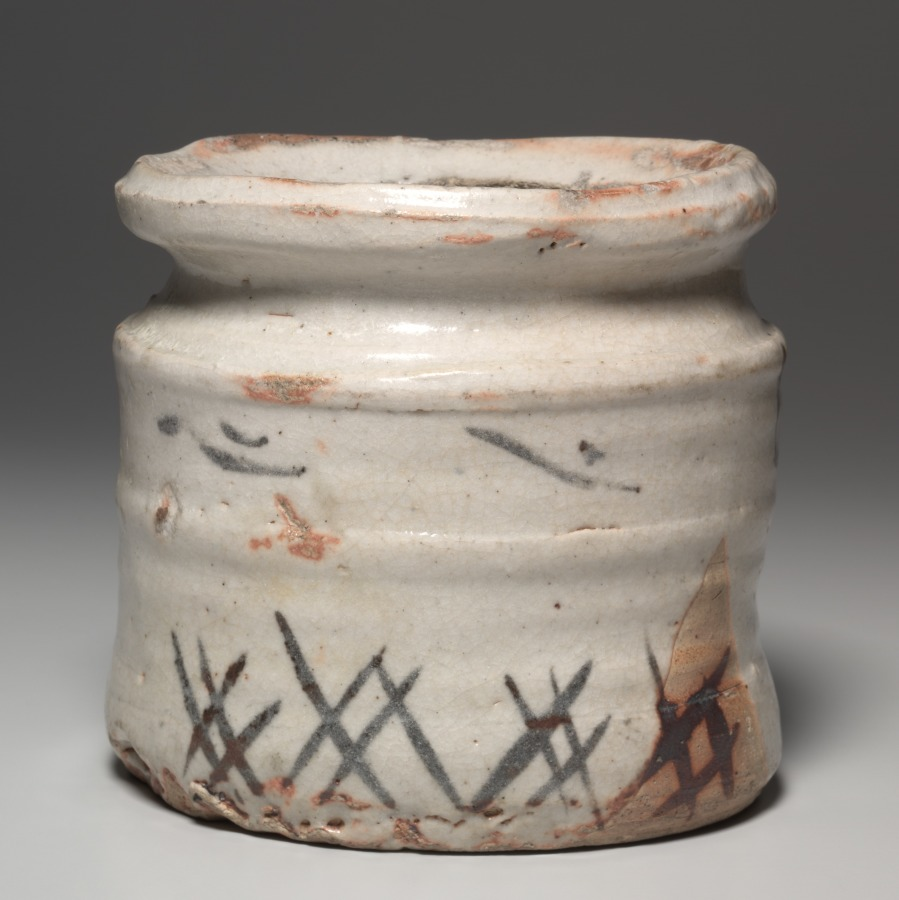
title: Water Container (Mizusashi) with Riverscape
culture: Japan, Momoyama period (1573-1615) to Edo period (1615-1858)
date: late 1500s–early 1600s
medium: Stoneware with underglaze iron oxide slip decoration (Mino ware, Shino type) and lacquer lid (modern replacement)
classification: Ceramic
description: Mizusashi are jars used to hold water for the preparation of tea at tea gatherings. This one was produced in the Mino area of present-day Gifu Prefecture in central Japan. It is called a “picture Shino” (e-shino) mizusashi, as it has an abstracted design on one side, said to resemble an ink painting of reeds and small boats along a riverbank, and a geometric pattern on the other. With its irregular shape and thick, luminous glaze, it is of a variety favored by eminent tea masters of the Momoyama period.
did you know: The water this container held during a tea gathering was used to fill the kama, or iron pot in which the water is heated.